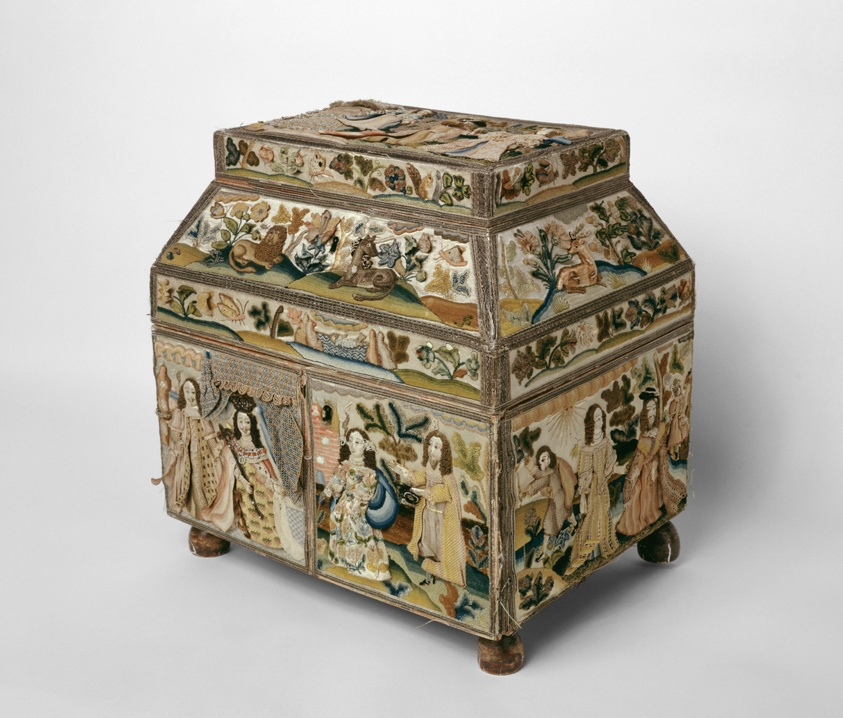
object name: Textile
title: Casket Depicting Scenes from the Old Testament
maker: Made by Rebecca Stonier Plaisted (English, 1653-1724); England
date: 1668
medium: Silk, warp-float faced satin weave; embroidered with silk floss, silk yarns, and silk-wrapped-metal purl in brick, bullion, Ceylon, chain, knot, lattice filling, overcast, running, satin, Smyrna cross, tent, and a variety of buttonhole stitches; laid work, couching, and padded couching; French and Turkey knots; applied areas of linen, plain weave; seed pearls, coral beads, and mica; and silk, plain weave with ground weft fringe; edged with gilt-metal-strip-wrapped silk and gilt-metal strip, plain weave; silver hardware; wooden frame; lined with marbled paper; silk, plain weave; and silk, plain weave with supplementary pile warps forming cut solid velvet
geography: England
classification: casket; needlework (visual works); textile; embroidery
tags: religious scenes, animals, biblical, birds, bows, buildings, butterflies, clouds, curtains, deer, dogs, dresses, hats, horses, insects, king, leopards, lions, people, plants, queens, rabbits, robes, sun, tents, water